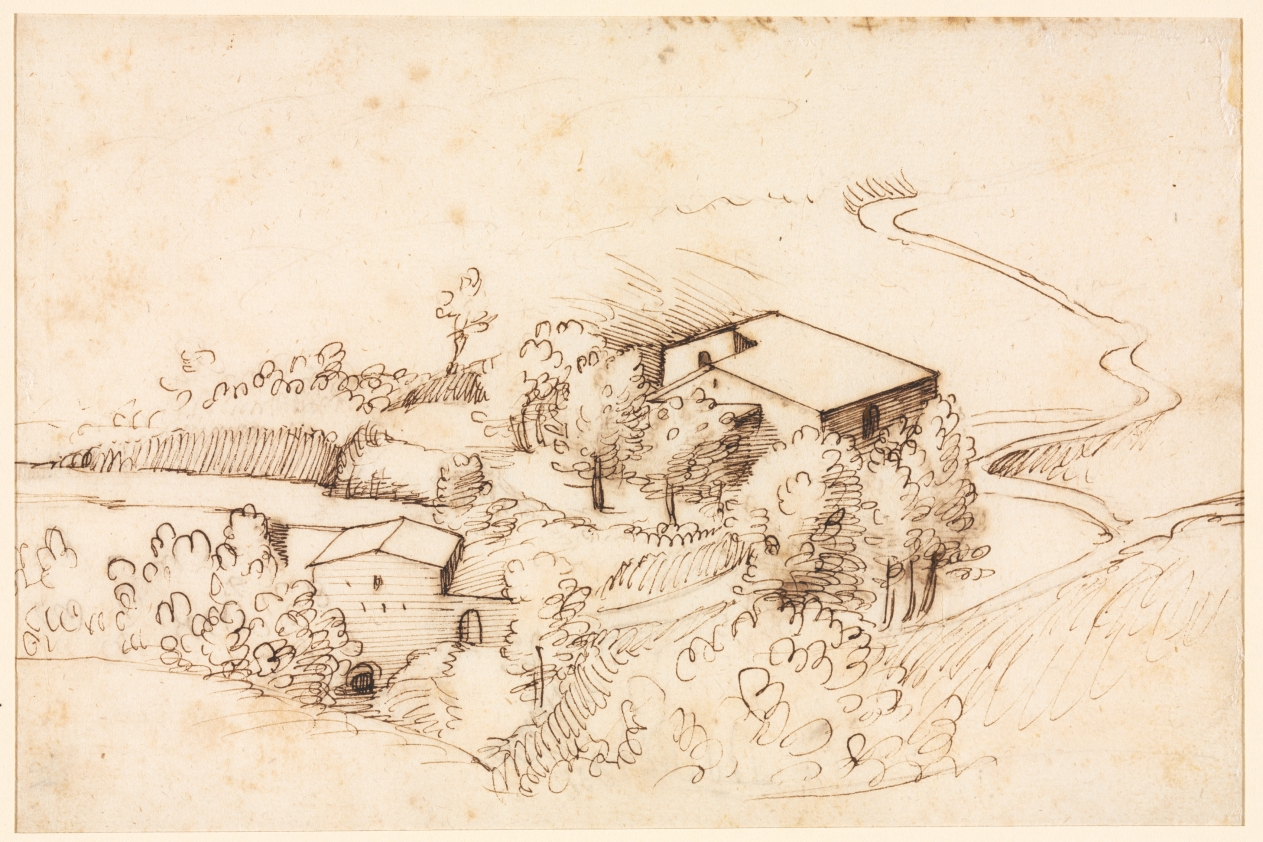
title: Farm with Trees in a Hilly Landscape (verso)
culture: Italy, 16th century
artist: Gherardo Cibo (Italian, 1512–1600)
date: 1567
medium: pen and brown ink (iron gall)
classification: Drawing